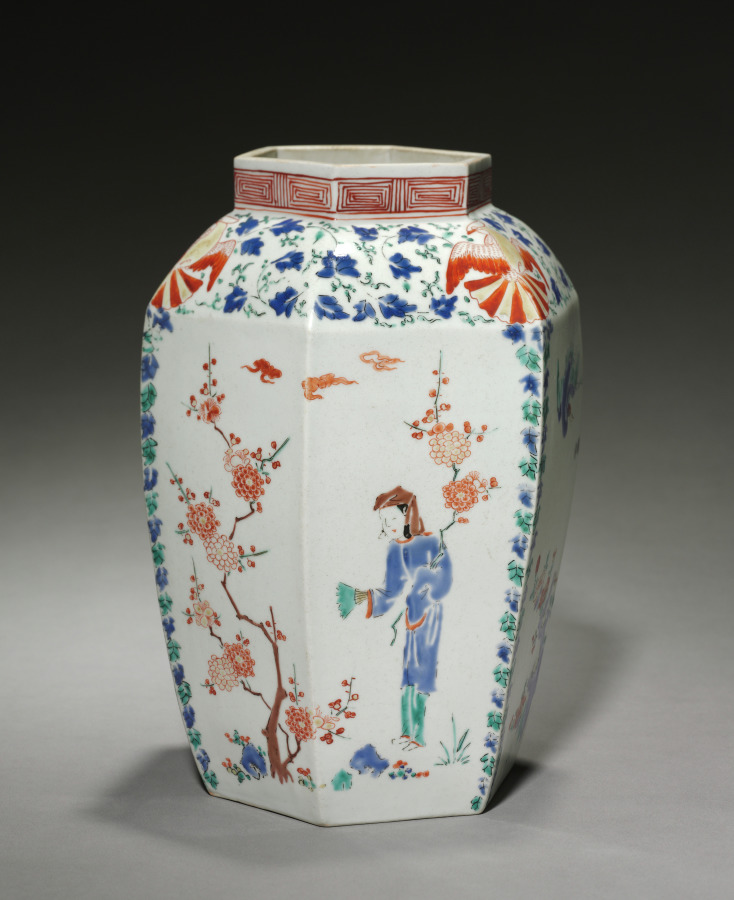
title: Hexagonal Jar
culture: Japan, Edo period (1615–1868)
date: late 1600s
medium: One of a pair; porcelain with overglaze color enamel and gold decoration (Hizen ware, Kakiemon type)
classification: Ceramic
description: This kakiemon-type jar with plum design is a product made for the European markets. Here, Japanese kakiemon potters transformed the typical plum, bamboo, and pine motifs into a theme appreciating the plum. The 9th-century Japanese scholar and politician Sugawara Michizane established the plum as a symbol of scholarship. An excellent poet, particularly of Chinese-style poetry, he was also well known for his love of plum blossoms. Later, the plum came to represent tenmangu, a shrine for Sugawara.